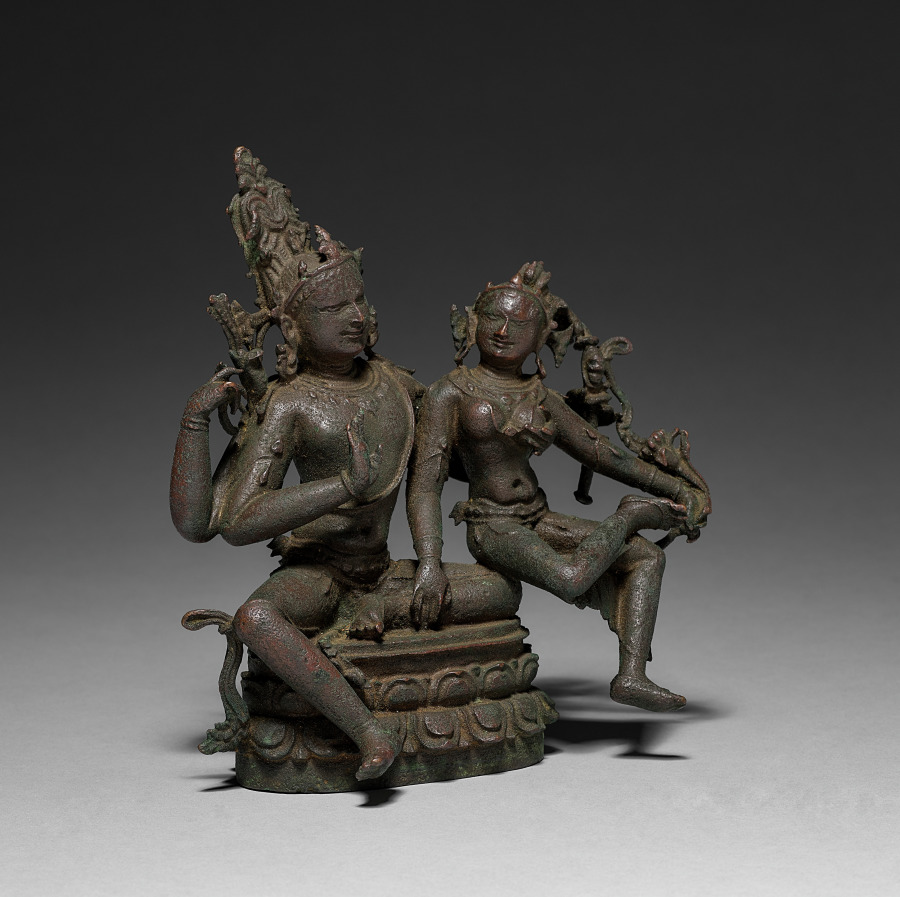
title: Shiva and Parvati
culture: East India, Bengal, Pala period, 9th Century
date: 800s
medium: bronze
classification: Sculpture